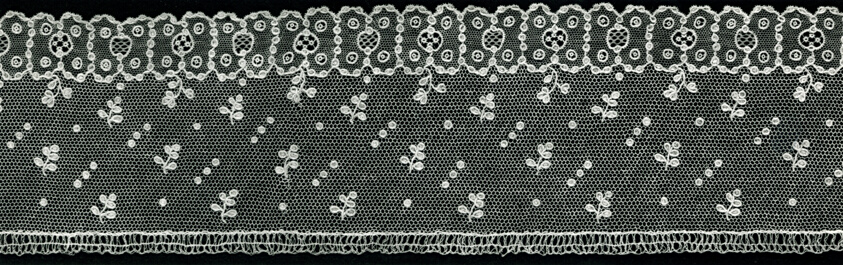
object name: Textile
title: Border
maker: France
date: 1875/1900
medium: Linen, needle lace of a type known as "Point d'Argentan" with a whipped mesh ground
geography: France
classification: textile; lace - needle